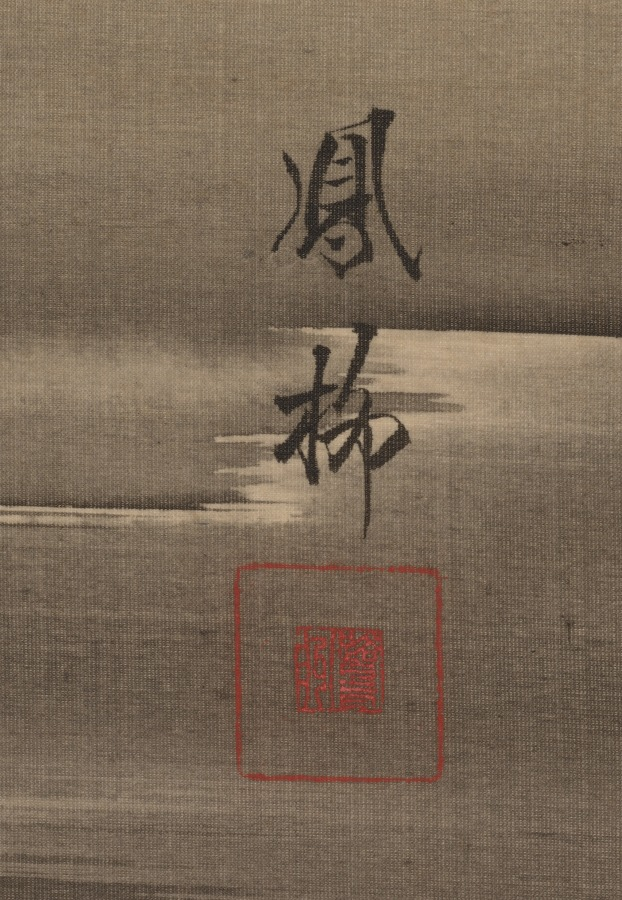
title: Howling Wolf in a Deep Mountain Valley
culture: Japan, Taishō period (1912–26)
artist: Yoshimura Hōryū (Japanese, 1874–1950)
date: 1912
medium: Hanging scroll; ink and color on silk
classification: Painting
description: A wolf howls beneath the tall pines in a misty landscape. The painter was born in the bustling city of Osaka in the Kansai region. He studied with Mori Jihō (1818–1891) and admired the Maruyama school of painters. He was especially gifted at depicting deer, monkeys, tigers, weasels, and other animals.